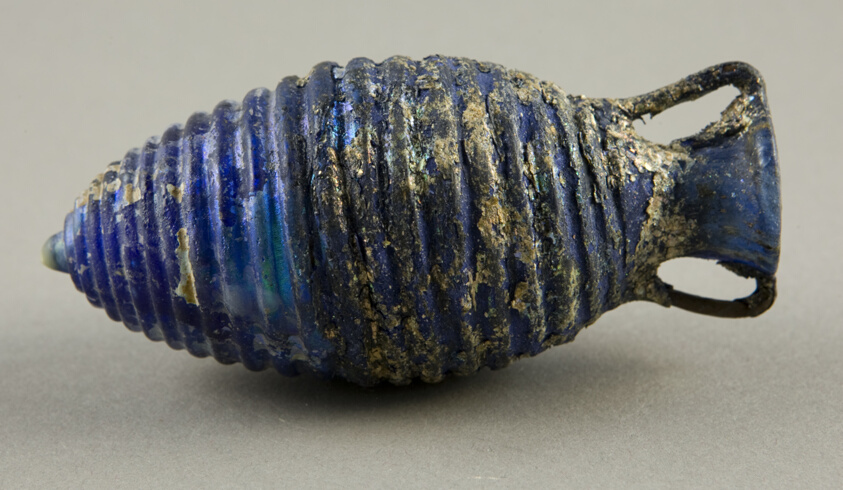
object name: Vessel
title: Vase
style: syrian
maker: Roman; Levant or Syria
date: 2nd century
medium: Glass, mold-blown technique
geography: Syria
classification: glass; vessel; ancient art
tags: vases